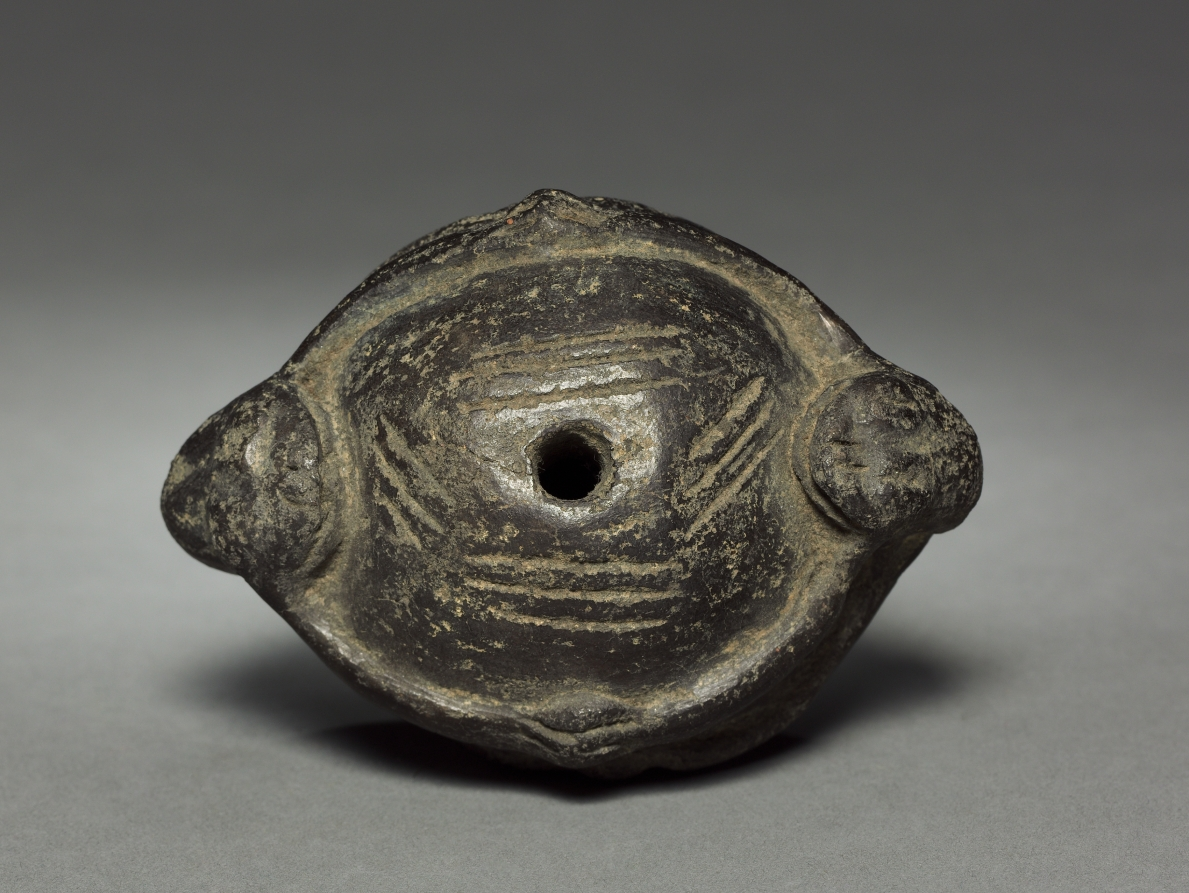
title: Jar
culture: Colombia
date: before 1921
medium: pottery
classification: Ceramic